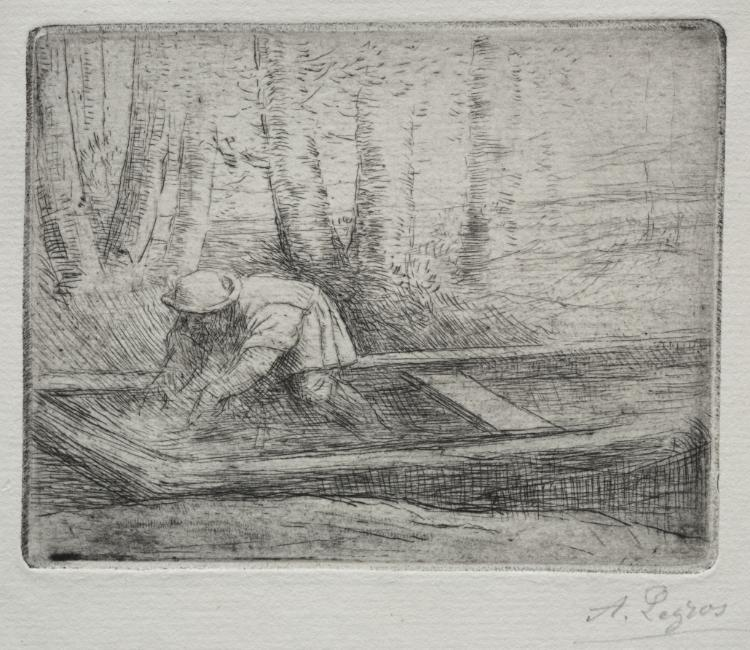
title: Man in a Punt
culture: France, 19th-20th century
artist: Alphonse Legros (French, 1837–1911)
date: c. 1857–1911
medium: etching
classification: Print